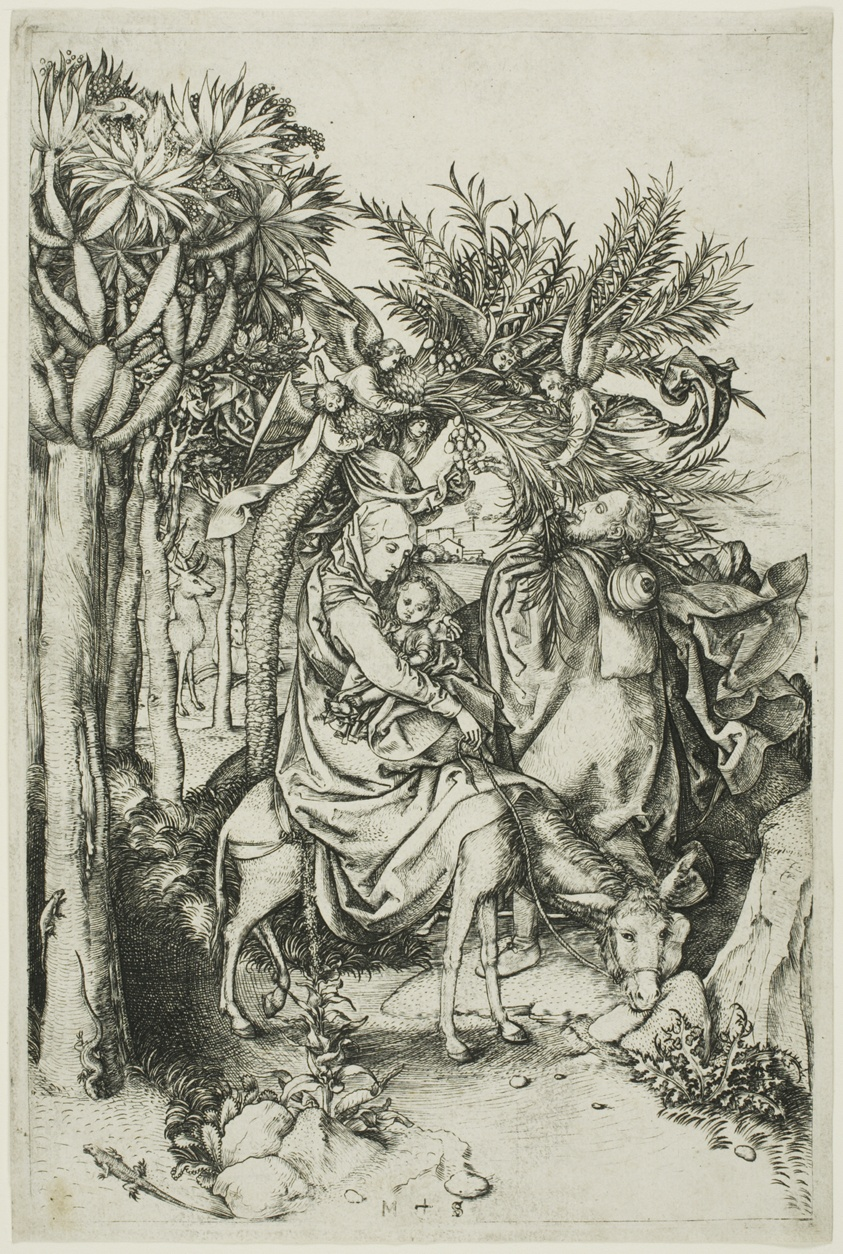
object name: Print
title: The Flight into Egypt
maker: Martin Schongauer (German, c. 1430/50-1491)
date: 1488–91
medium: Engraving on paper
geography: Germany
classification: engraving; print; prints and drawing